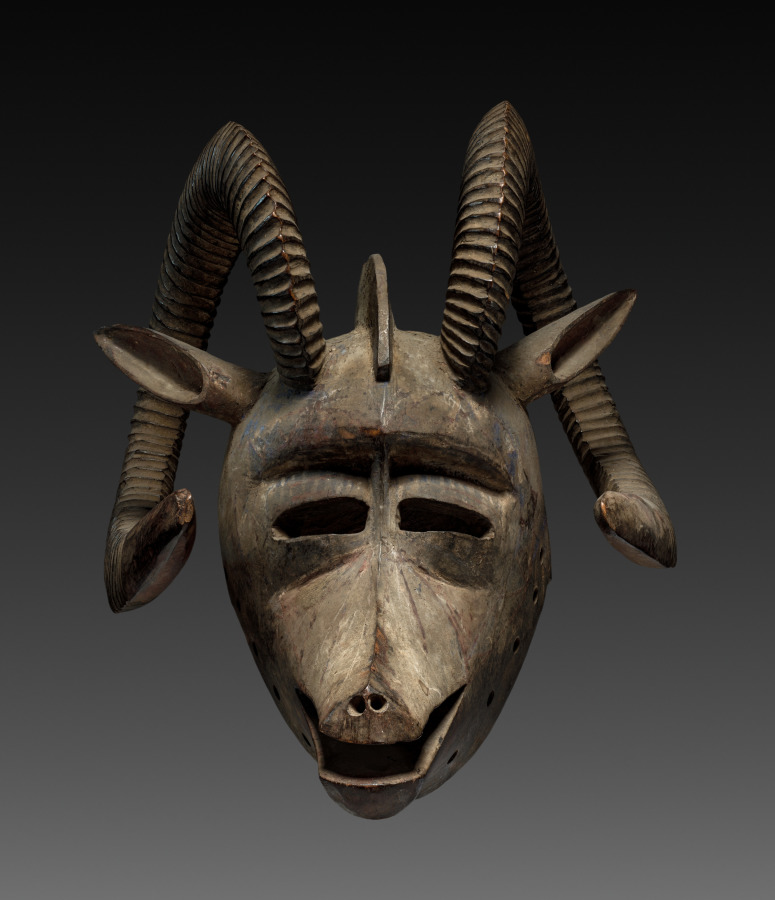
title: Ram Mask (Bolo)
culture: Africa, West Africa, Burkina Faso, Bobo-style blacksmith-carver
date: possibly early 1900s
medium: Wood and paint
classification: Mask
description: Bolo masks are primarily danced for entertainment during communal occasions like funerals, male initiations, and harvest celebrations. Comprising both animal and human features, the mask––always worn by a male dancer––refers to the cultural significance of the ram, an animal associated with male aggression across sub-Saharan Africa.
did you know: The mask was vividly painted while in use. Look closely at its surface to see traces of blue, red, and white paint.